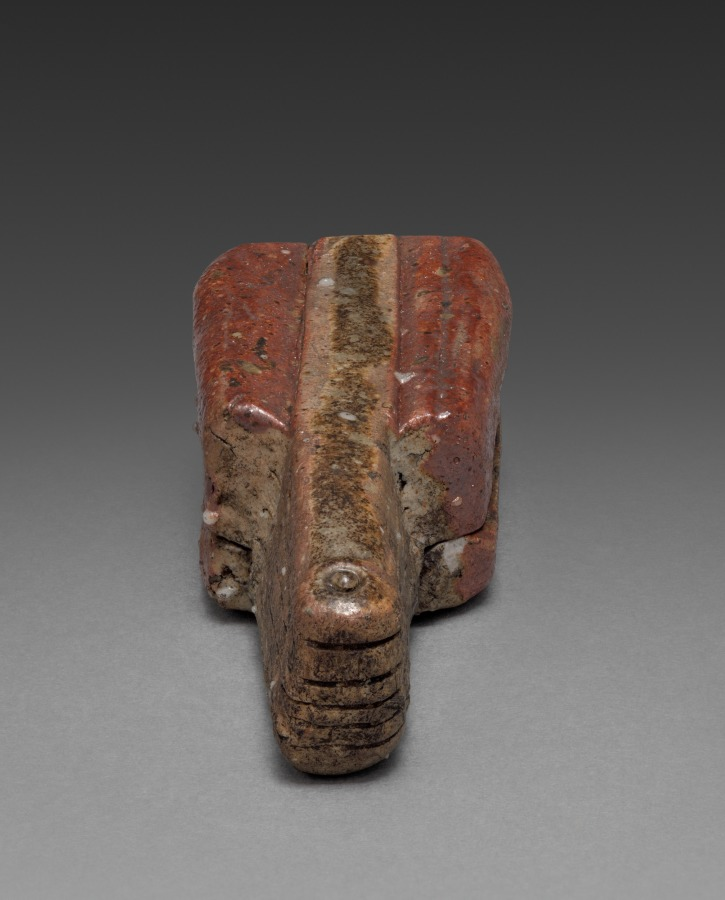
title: Ink Box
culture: Japan, Edo period (1615–1868)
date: early to mid-1800s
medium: pottery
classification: Ceramic